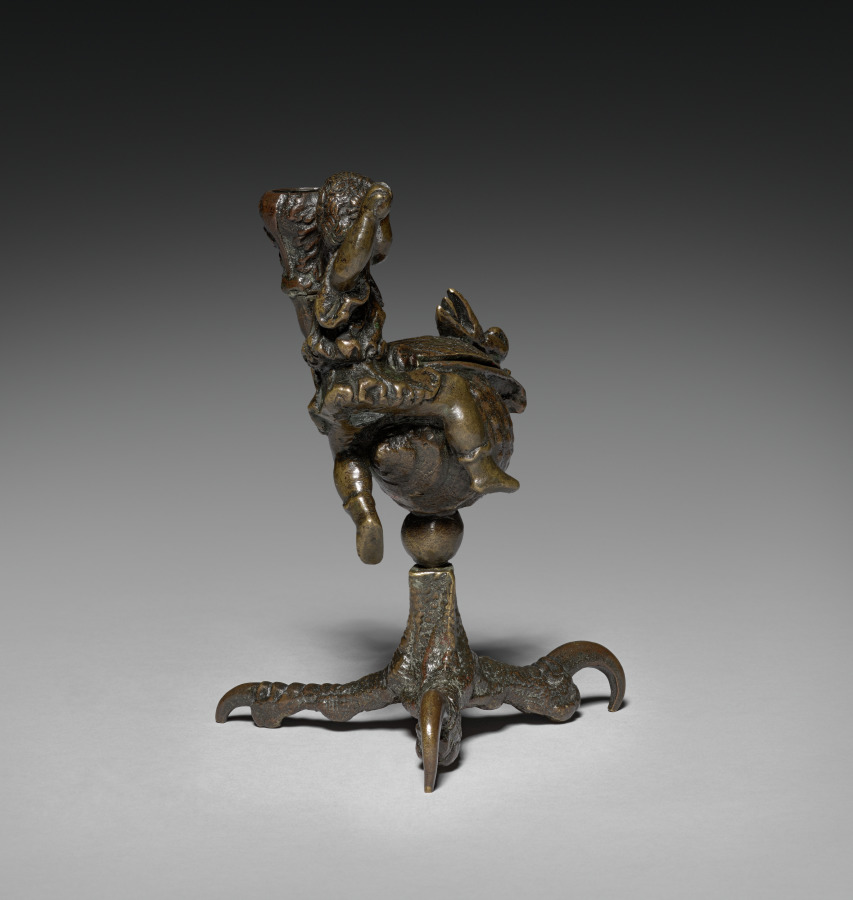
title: Inkwell and Candlestick with the Infant Hercules Killing the Serpents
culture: Italy, Ravenna, 16th century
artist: workshop of Severo da Ravenna (Italian, c.1496–c.1543)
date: c. 1510–20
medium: bronze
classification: Sculpture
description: In the early 1500s, Padua, a center of strong humanist traditions, encouraged the revival of classicism, and artists took their cues from descriptions in the works of classical authors. Classical small-scale bronzes grew in demand, and in response, the city's bourgeoning foundries produced a varied and extensive supply of small statues. Like many early Paduan bronzes, this work's utilitarian function—used to hold ink and to supply light—is complimented by its ornamental value. The base consists of an eagle claw, cast from life, supporting an equally realistic nautilus shell. Though medieval artists had occasionally used seashells to hold paints, the shell inkwell, whose small size makes it rather impractical to use, was a motif particular to Padua. Perched upon the shell is most likely Hercules, the son of Zeus. Perhaps aided by a staff (now missing) he is poised to strike a serpent, which according to myth was sent by Hera, the jealous wife of Zeus, to kill him. The dramatic opposition of hero and monster enhances the connection to the classical past, further meeting the desires of the educated patrons of Padua.